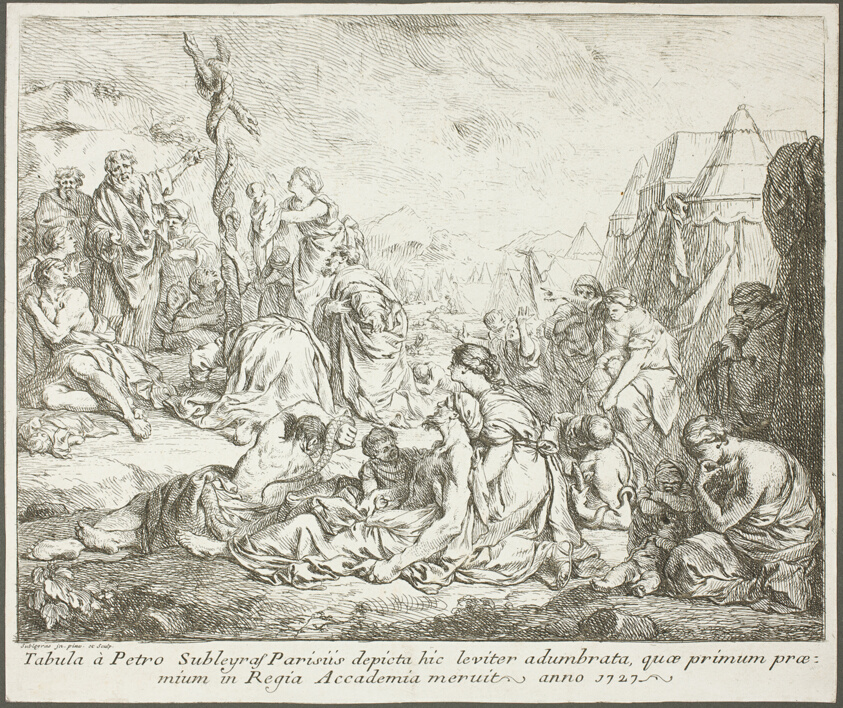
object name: Print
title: The Brazen Serpent of Moses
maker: Pierre Hubert Subleyras, French, 1699-1749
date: 1727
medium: Etching on off-white laid paper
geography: France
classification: etching; print; prints and drawing